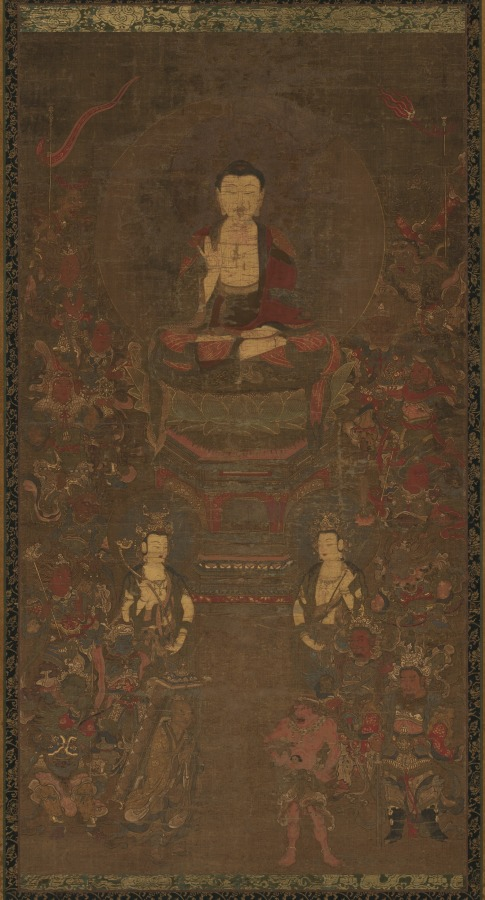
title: Shakyamuni with the Sixteen Benevolent Deities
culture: Japan, Nanbokuchō period (1336–92)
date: mid- to late 1300s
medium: Hanging scroll; ink, color, gold and cut gold on silk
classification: Painting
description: The historical Buddha Shakyamuni forms a triad with the bodhisattvas Fugen and Monju. Sixteen deities who protect the Buddhist scripture called the Great Perfection of Wisdom Sutra surround them. At the bottom left stands the Chinese monk Xuanzang, noted as a Buddhist scholar and translator of religious texts from India, including the Great Wisdom Sutra.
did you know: This painting would have been the main icon for ceremonial readings of the Great Perfection of Wisdom Sutra.